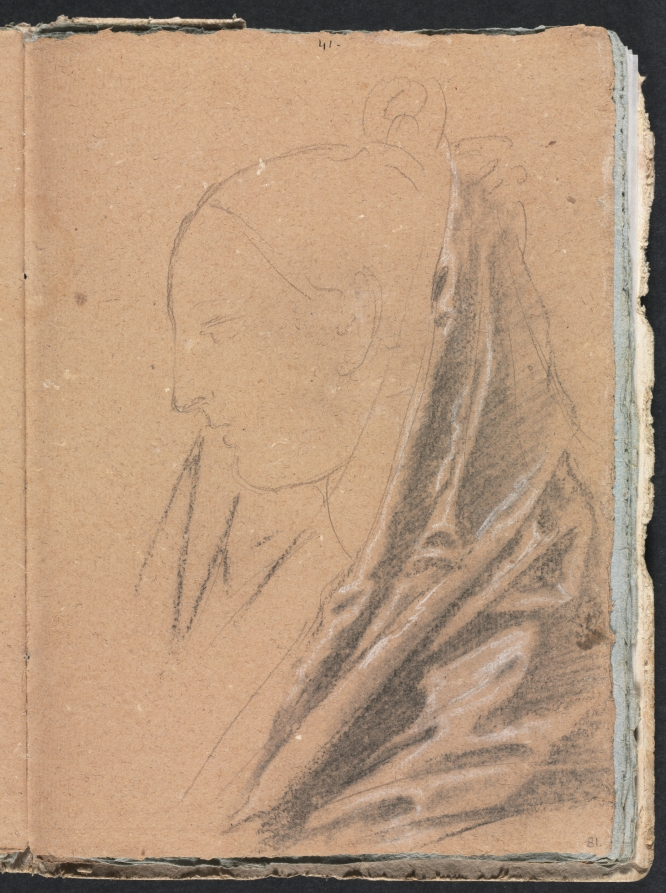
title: Verona Sketchbook: Female head with drapery (page 81)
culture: Italy, 18th century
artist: Francesco Lorenzi (Italian, 1723–1787)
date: 1760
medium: black chalk with white heightening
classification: Bound Volume